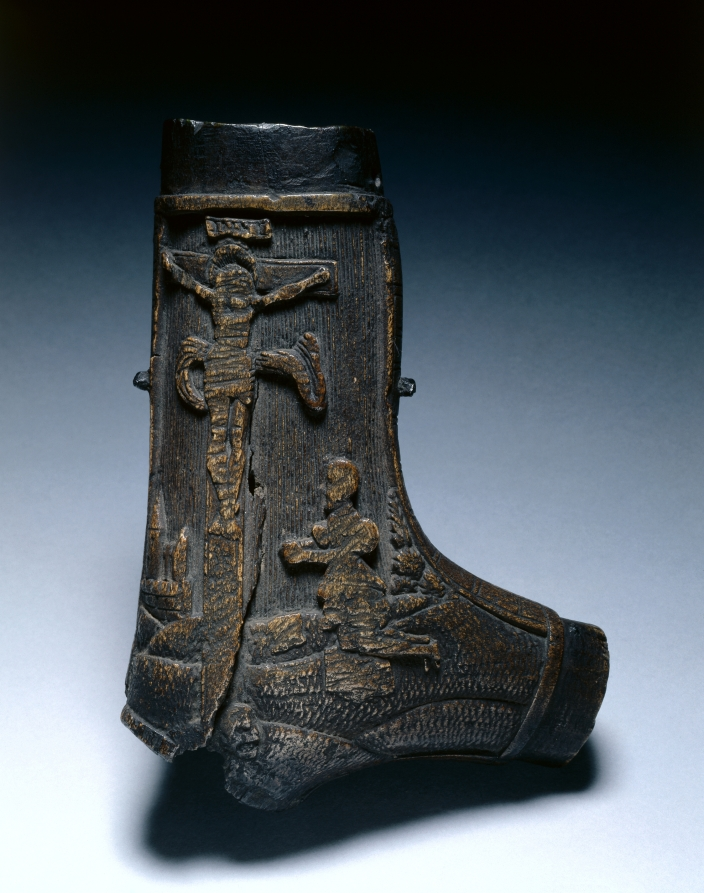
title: Powder Flask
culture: Germany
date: c. 1550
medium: carved staghorn (two branches); mounts missing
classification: Arms and Armor